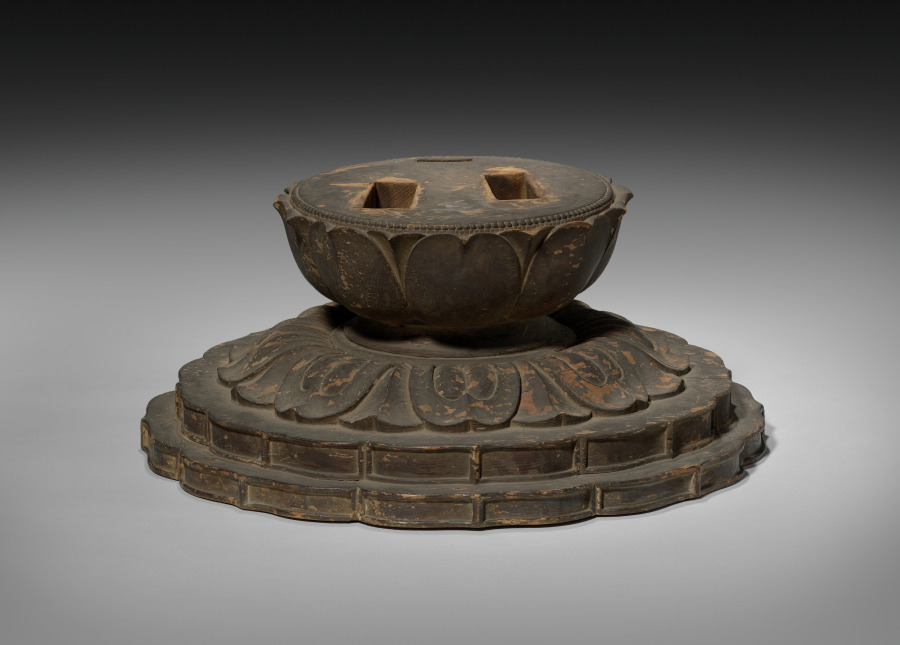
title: Standing Shokannon (lotus base)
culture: Japan, Heian period (794–1185)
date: 900s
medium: carved wood with polychromy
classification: Sculpture